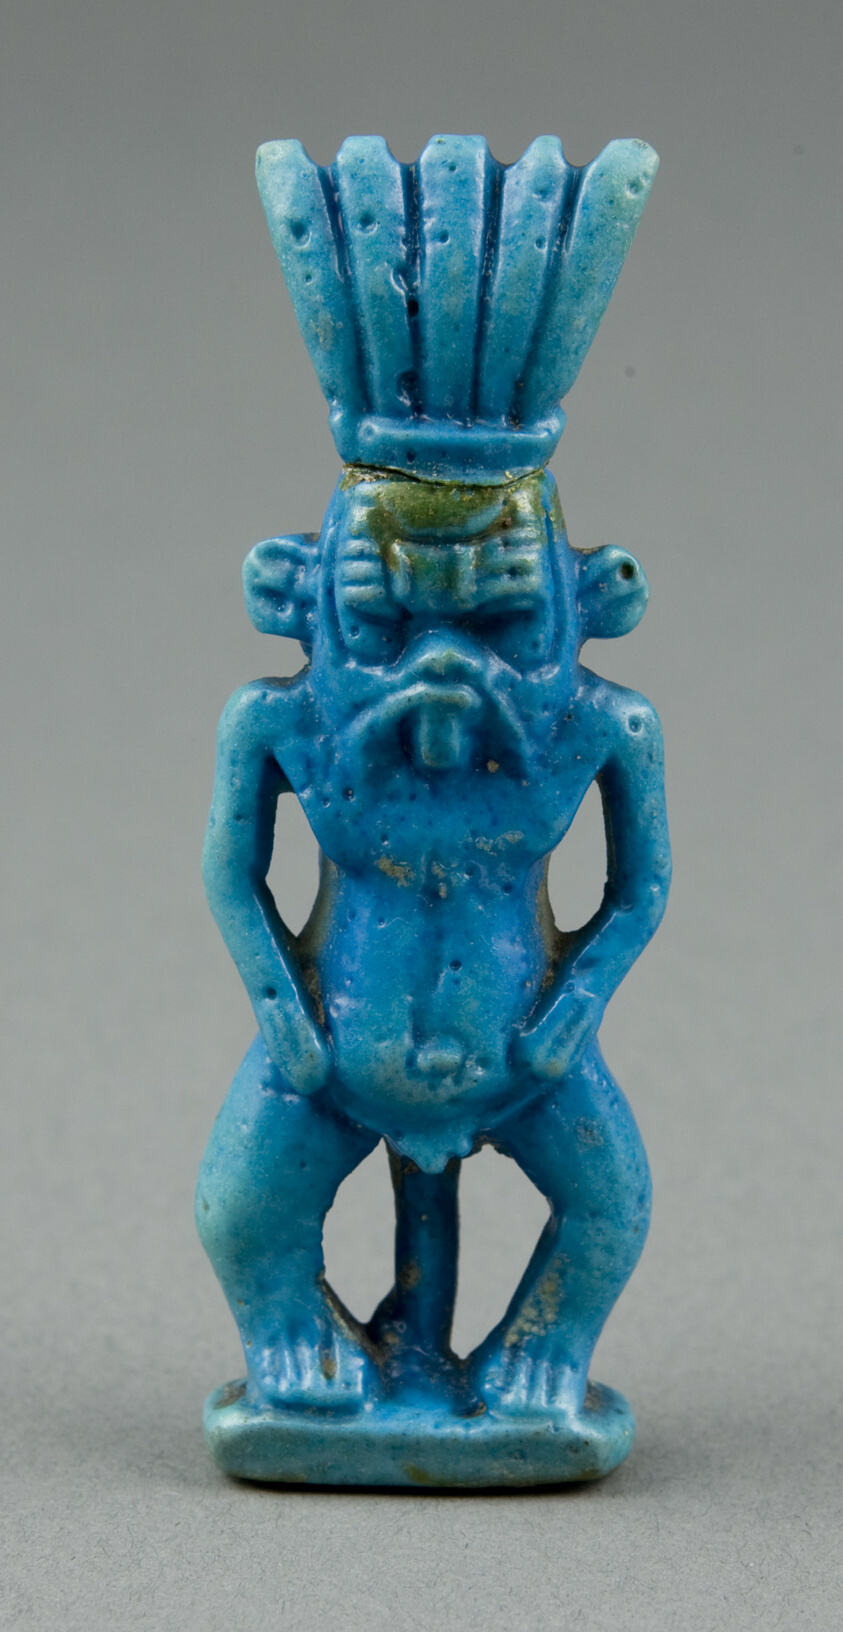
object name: Costume and Accessories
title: Amulet of Bes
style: third intermediate period, egyptian, ancient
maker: Egyptian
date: Third Intermediate Period, Dynasty 21–25 (1070–656 BCE)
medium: Faience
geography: Egypt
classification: amulet; jewelry; ceramics; ancient art; costume; faïence (composite material)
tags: gods (deities), crowns, lions